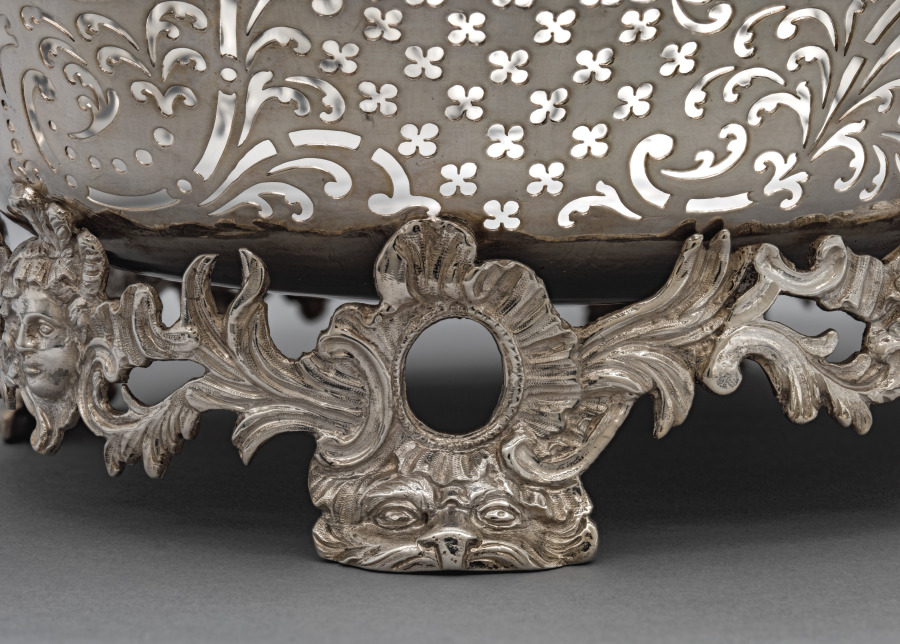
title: Cake Basket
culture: Britain, London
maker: Samuel Herbert and Company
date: 1753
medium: Silver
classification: Silver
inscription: “H/I I”; hallmark for London, George II, Samuel Herbert and Henry Bailey, and date 1753.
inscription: “To/H.H.M./from/S.K., E.W.G., J.H.J., D.R.L., M.B.R./on the occasion of his/Silver Wedding/1911-1936”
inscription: “50-2”; hallmark for London, George II, Samuel Herbert and Henry Bailey, and date 1753.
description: Drinking tea at the end of the day, accompanied by sweet cakes and savory delights, became an established ritual in Britain at all levels of society during the 1700s. In grand houses, silver teapots, caddies, and cake baskets elevated this afternoon refreshment to a formal gathering.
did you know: Sheaves of wheat adorning the rim of this basket allude to the flour used in pastries and cakes for tea.